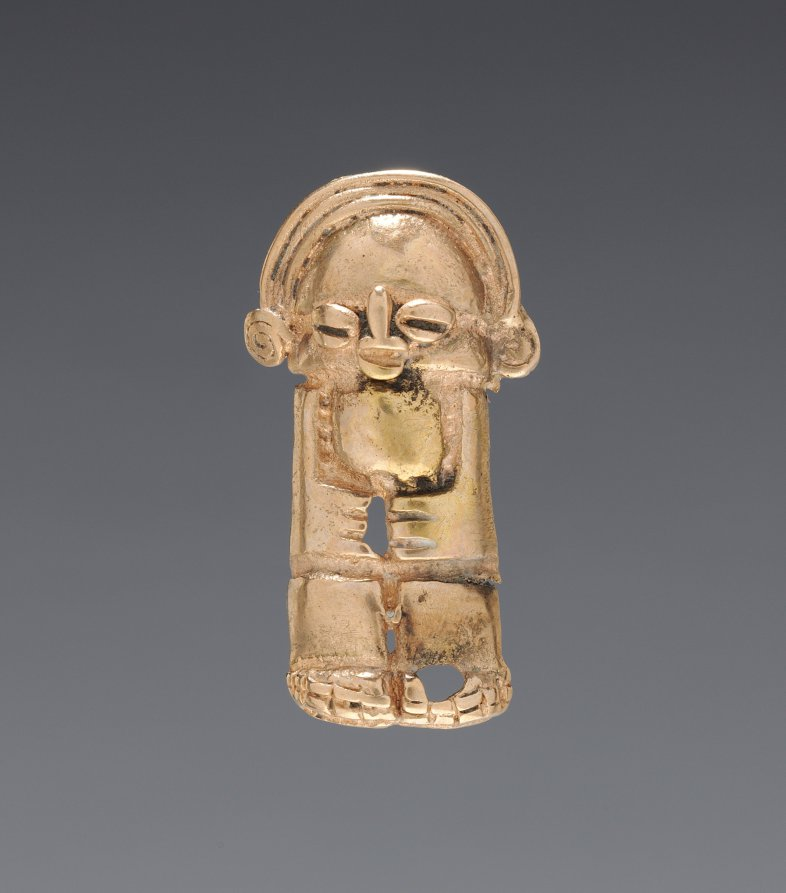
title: Necklace Figurine Bead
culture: Colombia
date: 1–700 CE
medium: cast gold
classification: Jewelry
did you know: Working with gold dates back to at least 500 BC in Ecuador and Colombia.